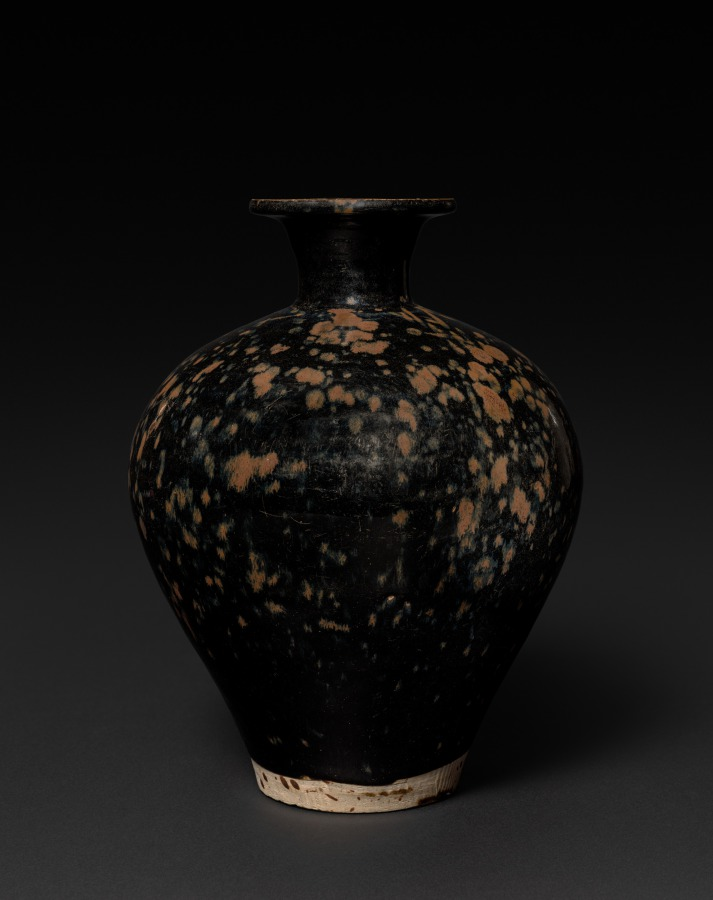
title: Vase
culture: China, Northern Song dynasty (960-1127)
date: 1000s–1100s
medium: glazed stoneware with underglaze iron decoration, Northern Black ware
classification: Ceramic